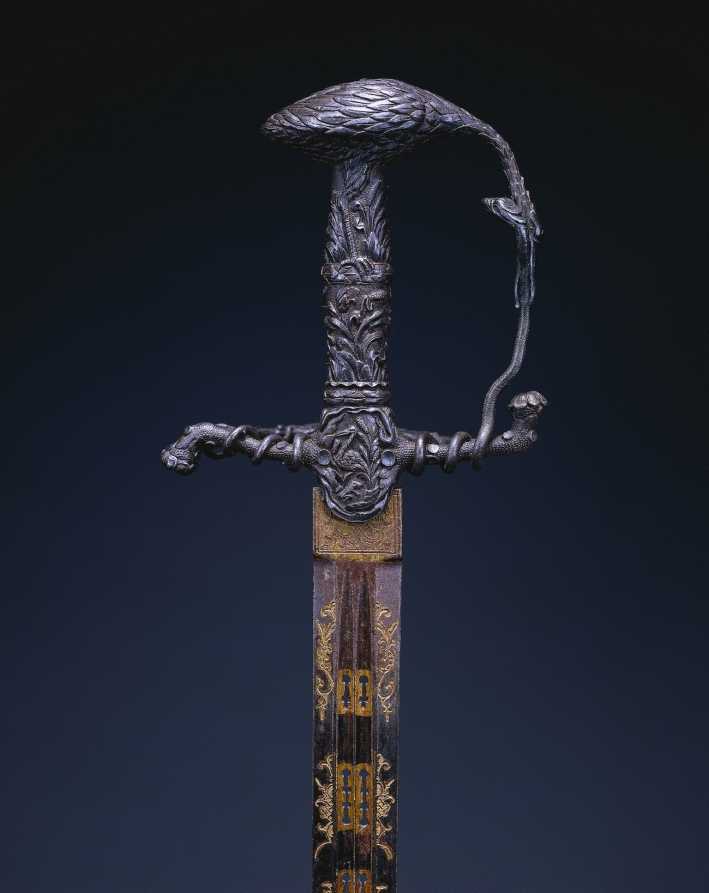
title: Rapier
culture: Germany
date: c. 1630–50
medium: steel; blued, gilded, and perforated blade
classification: Arms and Armor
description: The rapier was a sword worn with civilian dress and used in duels. The term rapier derives from a 16th-century French word rapière, which in turn derived from the Spanish espada ropera, or “dress sword.” The rapier was a light weapon with a straight double-edged and pointed blade that, with the development of the art of fencing in the 1500s and 1600s, gradually became narrower and lighter, and thus suitable for thrusts only. With the new technique of swordplay emphasizing the point of the blade, sword guards became more complex to protect the duelist’s unarmored hand. These elaborate guards were frequently decorated by various techniques—chiseling, bluing, russeting, and damascening.